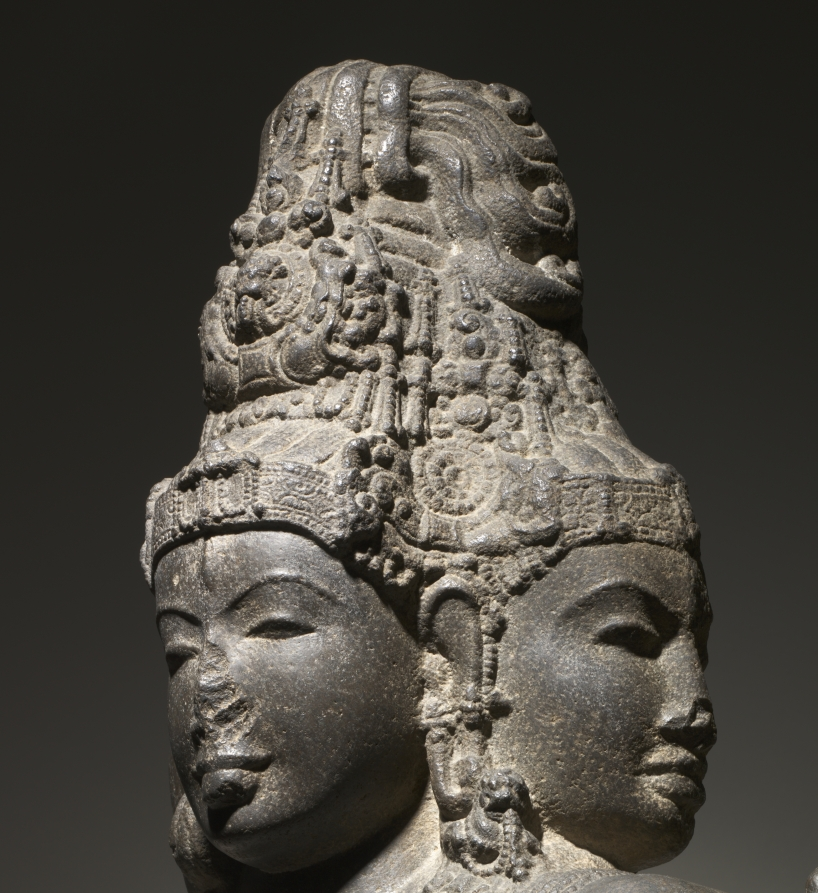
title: Brahma-Shiva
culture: South India, Tamil Nadu, Chola dynasty, late 10th - early 11th century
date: late 900s–1000s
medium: granite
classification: Sculpture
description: In the Hindu pantheon Brahma is in charge of carrying out the work of creation. In this tour-de-force of South Indian temple sculpture, he is in a special regal aspect, with the only elements of his typical priestly appearance being the prayer beads and the matted dreadlocks piled on his head. Four arms connote superhuman power, and four heads convey the idea that his creative activities spread in all four directions. His upper right hand enjoins freedom from fear, and the lower holds a lotus bud associated with birth and the process of creation. His lowered left hand is held in the gift-giving gesture, suggestive of the gift of creation he will bestow upon the world.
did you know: The back of the sculpture retains the original textured surface from a pointed chisel, suggesting it was in a niche or near a wall, protected from worshippers’ touches.